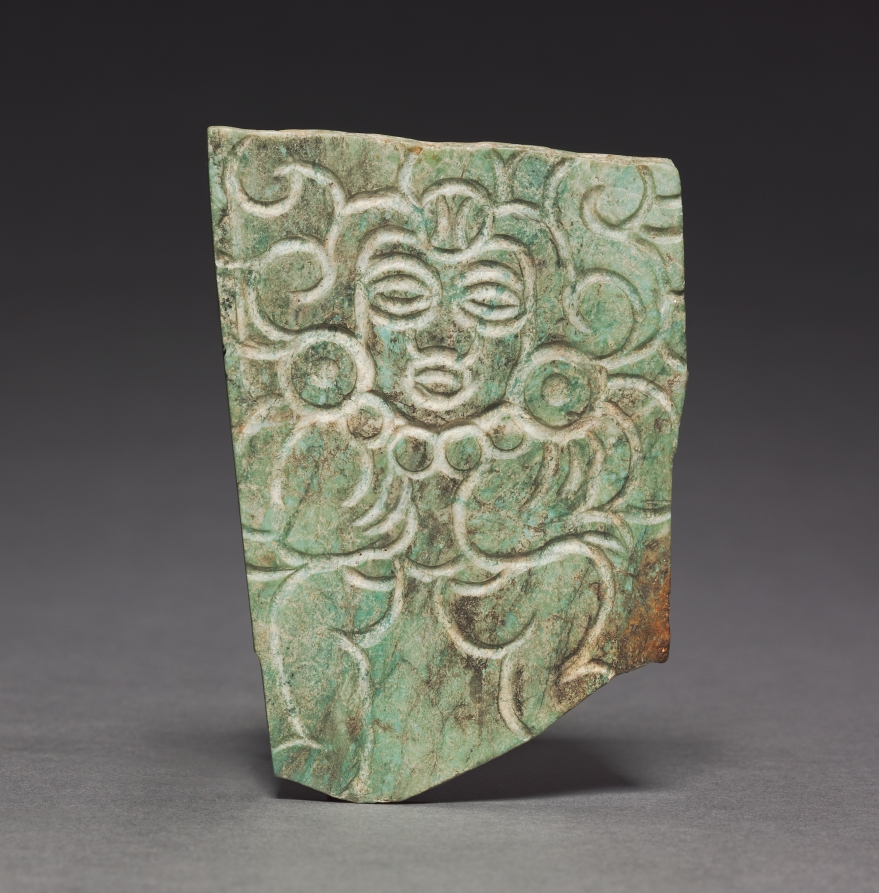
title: Pendant Plaque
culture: Central Mexico, Xochicalco Style, 8th-10th Century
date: c. 700–1000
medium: greenstone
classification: Stone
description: Xochipala jade carvings are typically composed almost entirely of curved lines. These were executed with hollow circular drills (perhaps made of bird bone or bamboo) of different diameters. The result is an animated figure that appears to be dancing.